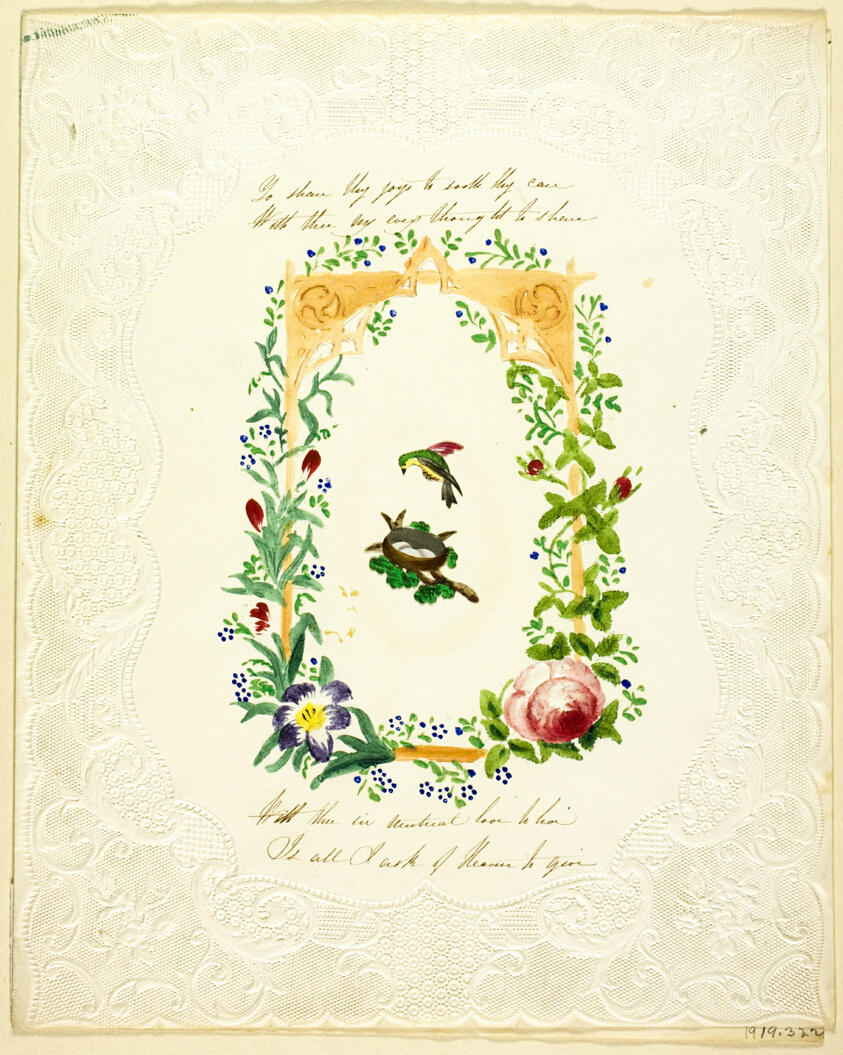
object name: Drawing and Watercolor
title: You Share Thy Joys to Soothe Thy Care (valentine)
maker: Unknown Artist; English, 19th century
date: c. 1840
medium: Watercolor with pen and brown ink on embossed ivory wove paper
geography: England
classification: valentine; prints and drawing; paper